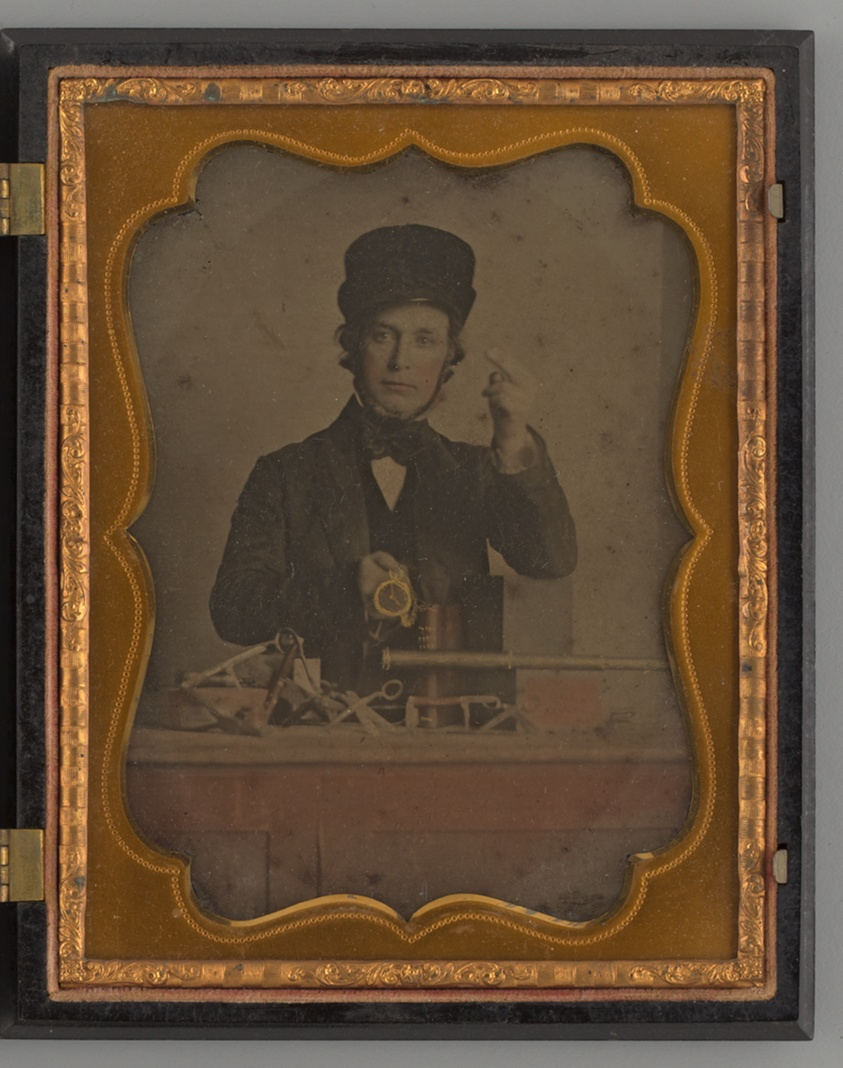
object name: Photograph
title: Untitled (Portrait of a Man)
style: 19th century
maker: Unknown maker; American, 19th century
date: 1865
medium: Ambrotype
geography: United States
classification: portrait; photography; photographic process; photograph; ambrotype; portrait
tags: lundberg collection, Male, portrait, portraits, portraits: male subject